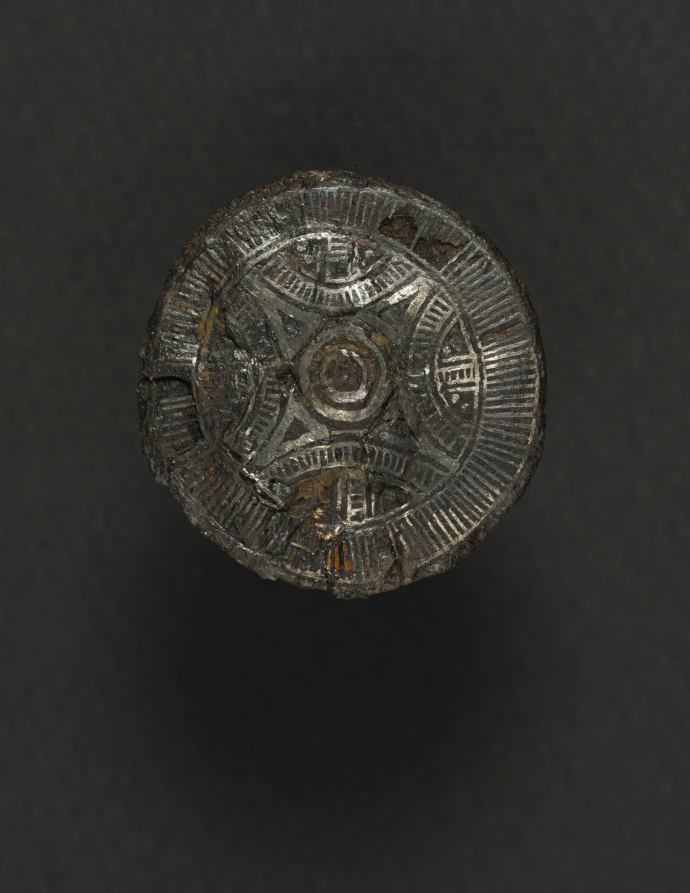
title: Disk Ornament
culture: Frankish, Migration period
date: 600s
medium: iron with silver overlay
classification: Jewelry